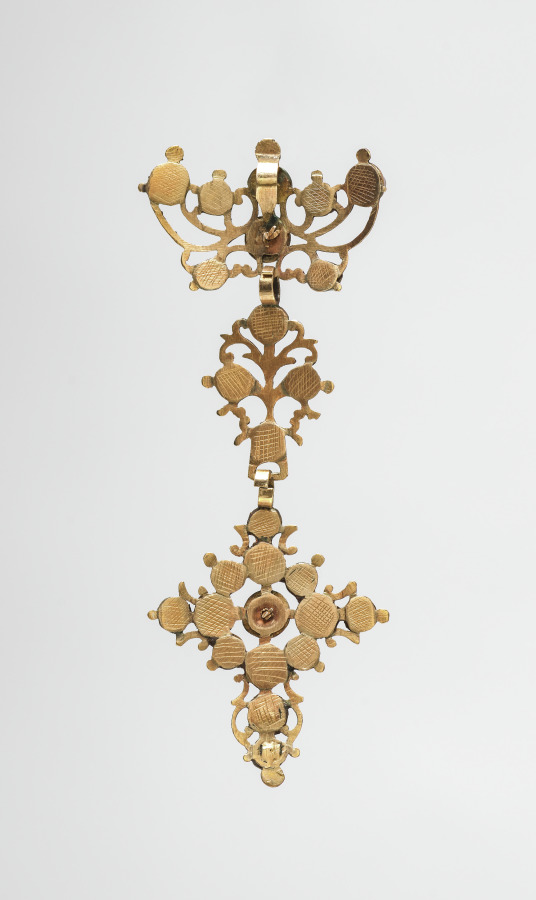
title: Woman's Costume (Pendant)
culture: Italy, 19th century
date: 1800s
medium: gold and jewels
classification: Jewelry